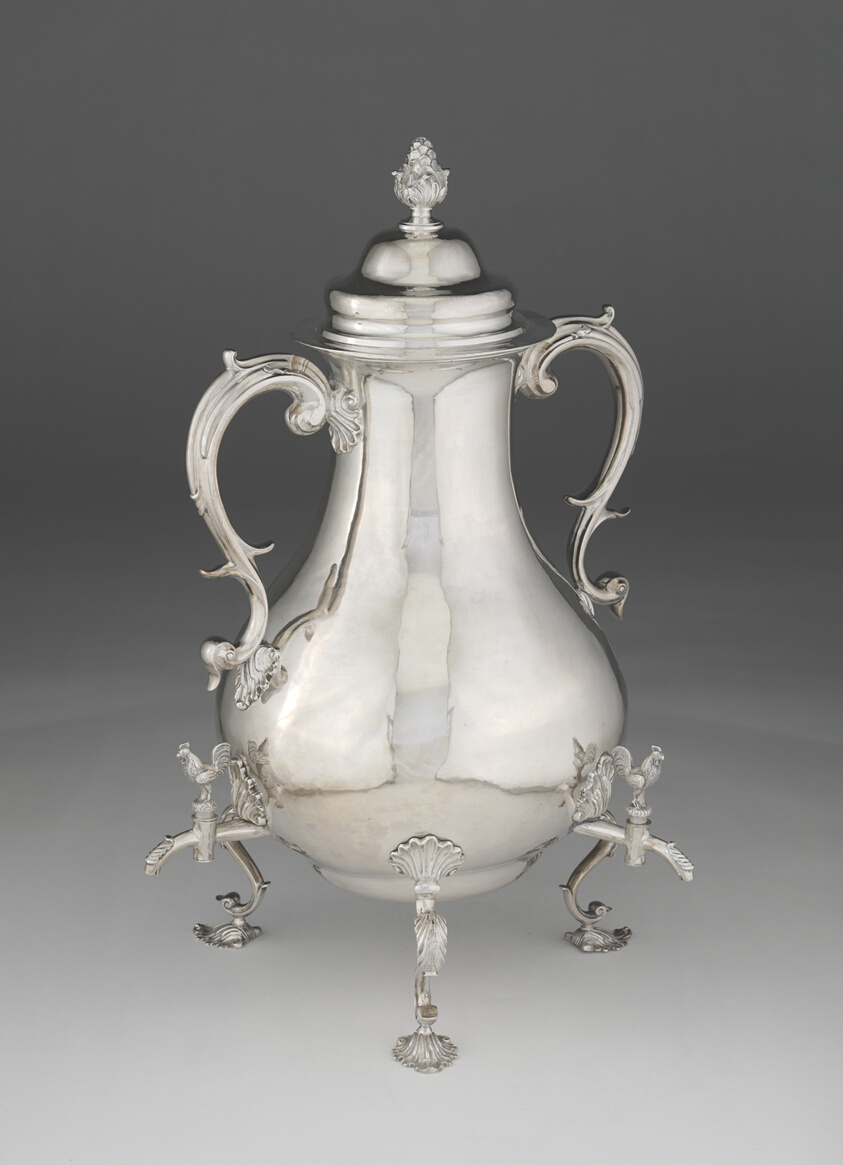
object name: Metalwork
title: Urn with Cover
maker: Ephraim Brasher; American, 1744–1810; New York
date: c. 1770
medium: Silver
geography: New York City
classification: vessel for serving drinks; silver; american decorative arts; american arts; decorative arts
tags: dining, drinking